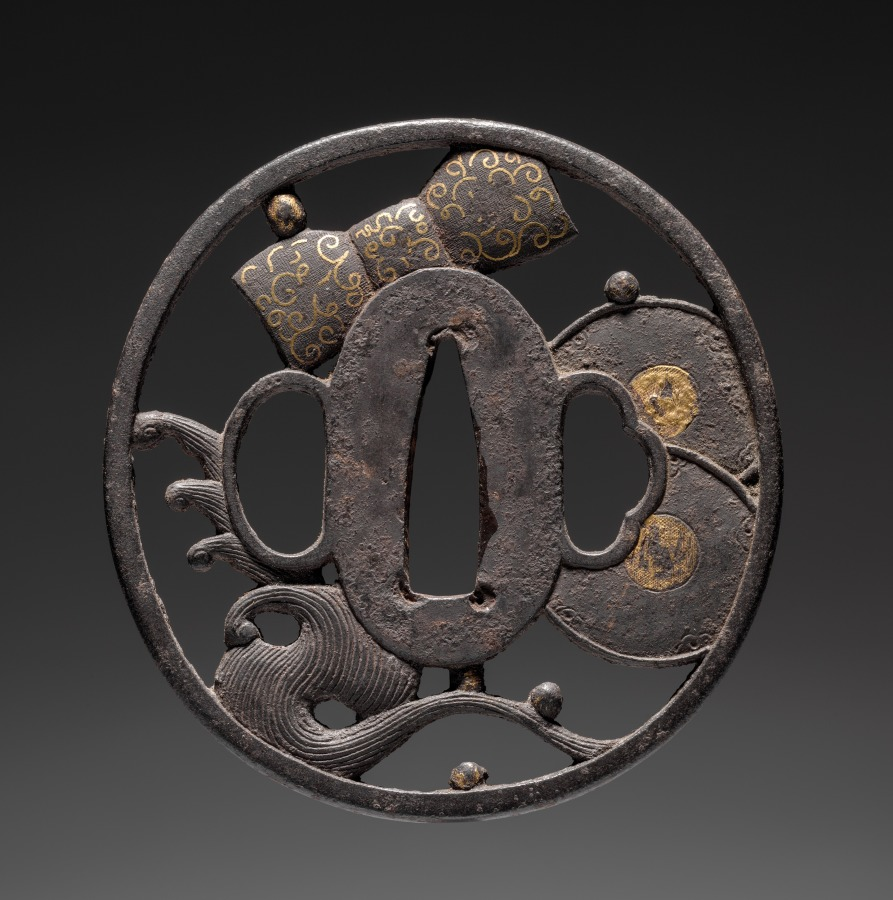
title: Sword Guard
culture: Japan, possibly Edo period (1615-1868)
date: c. 1615–1868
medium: iron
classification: Arms and Armor